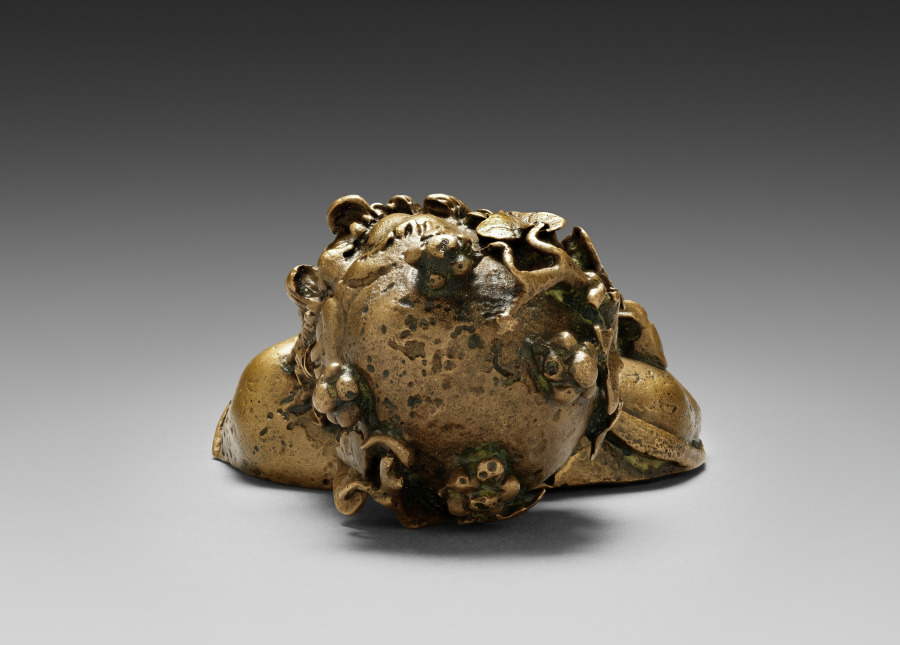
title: Silenus Bust for a Couch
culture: Italy, Roman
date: 1–125 CE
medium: bronze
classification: Sculpture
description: This bust of Silenus was part of the fulcrum or armrest of an ancient Roman couch. Silenus was the tutor and companion of Bacchus, the Roman god of wine. He is shown with a long curly beard, bushy eyebrows, and wearing a garland of ivy vines with berries. His deerskin robe, tied by the animal’s hoof, falls off his shoulder, suggesting drunkenness. The bust would have been placed at the base of the armrest where it met the seat of the couch, while an animal head likely decorated the top. As is the case with many Roman objects, Romans adapted their couch style and decoration from the Greeks.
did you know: This silenus’s beard is made up of exactly ten ringlets of curls.